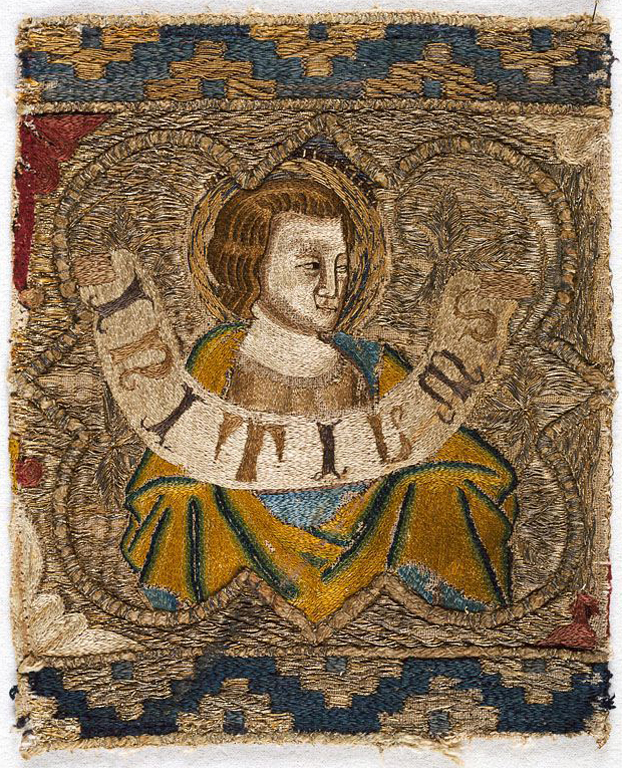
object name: Religious/Ritual Object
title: Fragment from an Orphrey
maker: Italy, Florence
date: 1360s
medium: Linen, plain weave; underlaid with linen, plain weave; embroidered with silk, gilt- and silvered-metal-strip-wrapped silk in split and surface satin stitches; laid work, couching, and padded couching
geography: Florence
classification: textile; needlework (visual works); liturgical; ritual objects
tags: religious scenes